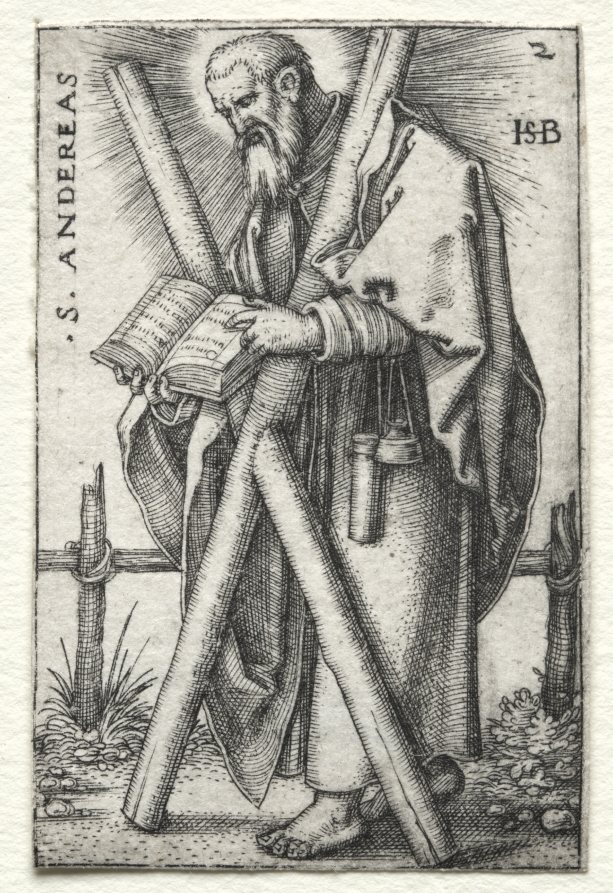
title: St. Andrew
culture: Germany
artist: Hans Sebald Beham (German, 1500–1550)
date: 1545–1546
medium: engraving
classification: Print